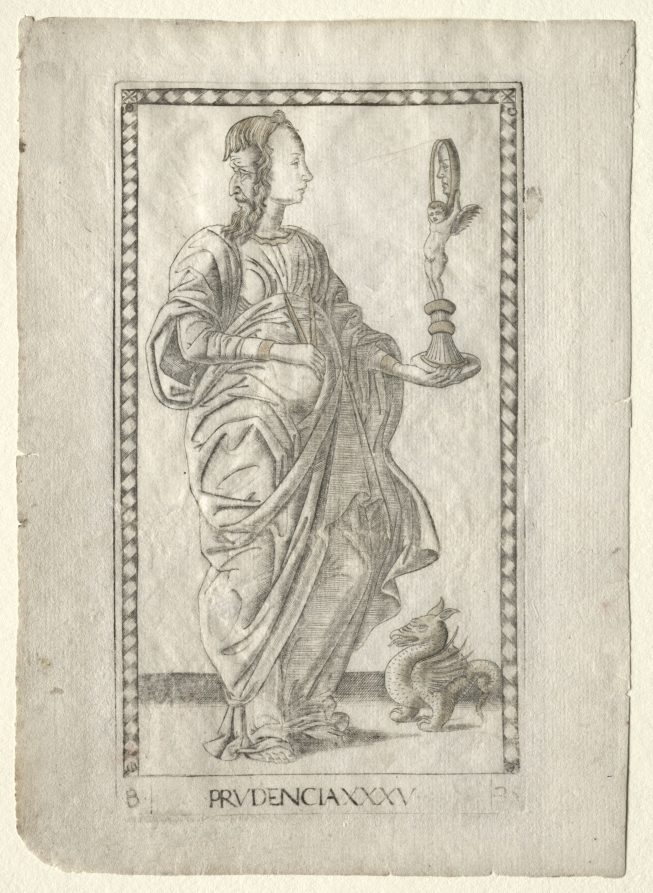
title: Prudence (from the Tarocchi, series B: Cosmic Principles & Virtues, #35)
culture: Italy, Ferrara, 15th century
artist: Master of the E-Series Tarocchi (Italian, active 1460s)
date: before 1467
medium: engraving, hand-colored with gold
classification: Print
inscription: Lettered below the image of Prudencia (Prudence): ·B· / ·PRUDENCIA·XXXV· / ·35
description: This engraving is part of the group marked with the letter “B,” and named Cosmic Principles and the Virtues, which comprises the three Universal principles (Light, Time, and Space) alongside the three theological virtues (Faith, Hope, and Charity) and the four cardinal ones (Prudence, Temperance, Fortitude, and Justice). The latter were regarded as the basic Christian principles required for a virtuous life. Here, Prudence is personified as a full-length female figure with a bearded visage of an old man placed on the back of a graceful woman’s head. These two profiles represent the ability to see the past and to observe the present and future, respectively. Prudence looks at her reflection in a mirror, which is supported by a cupid figure standing on a pedestal. The mirror refers to Prudence’s gift of self-knowledge. Next to her on the lower right is a dragon believed to be a wise creature and a representative of the world of serpents.